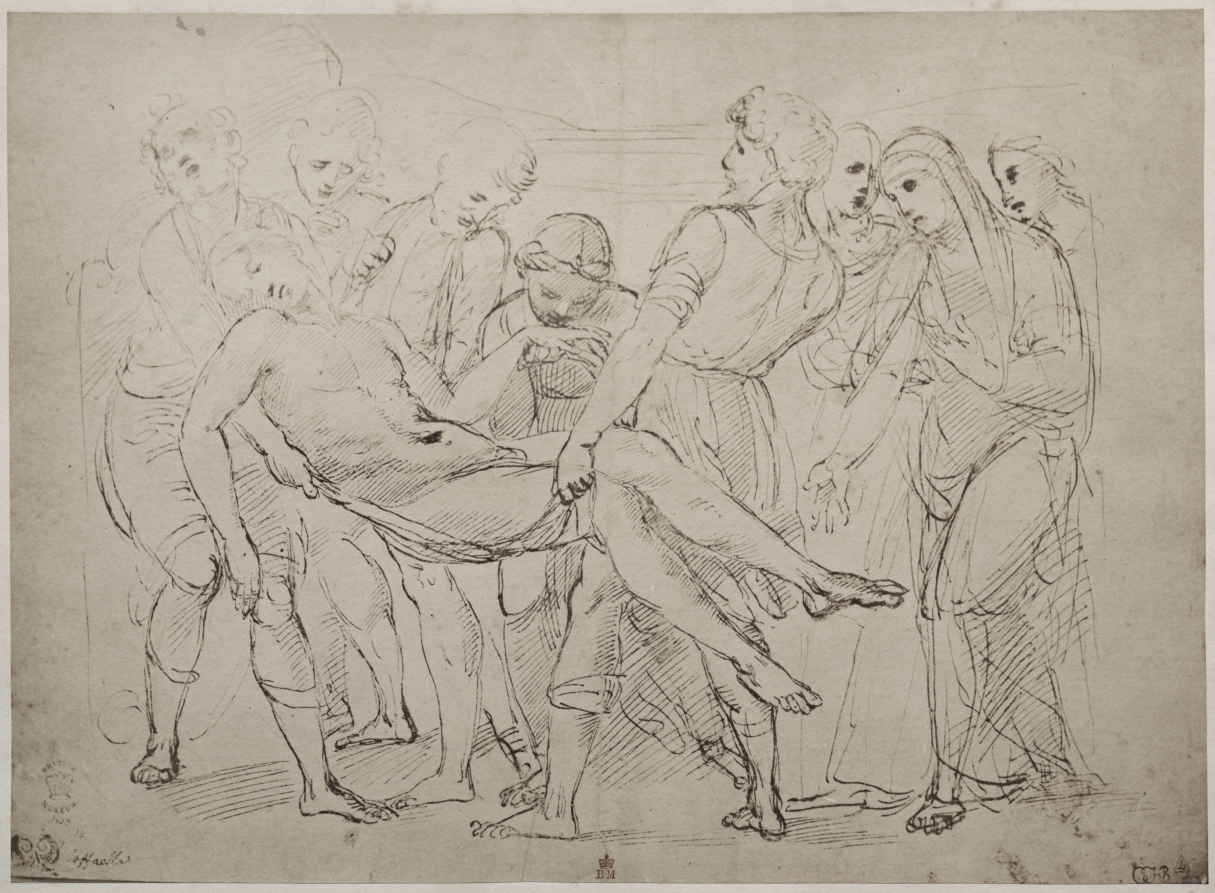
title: Drawing by Raphael Sanzio in the British Museum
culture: England, 19th century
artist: Roger Fenton (British, 1819–1869)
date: 1856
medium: salt print from a collodion negative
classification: Photograph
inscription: written on lower right: "CHL"